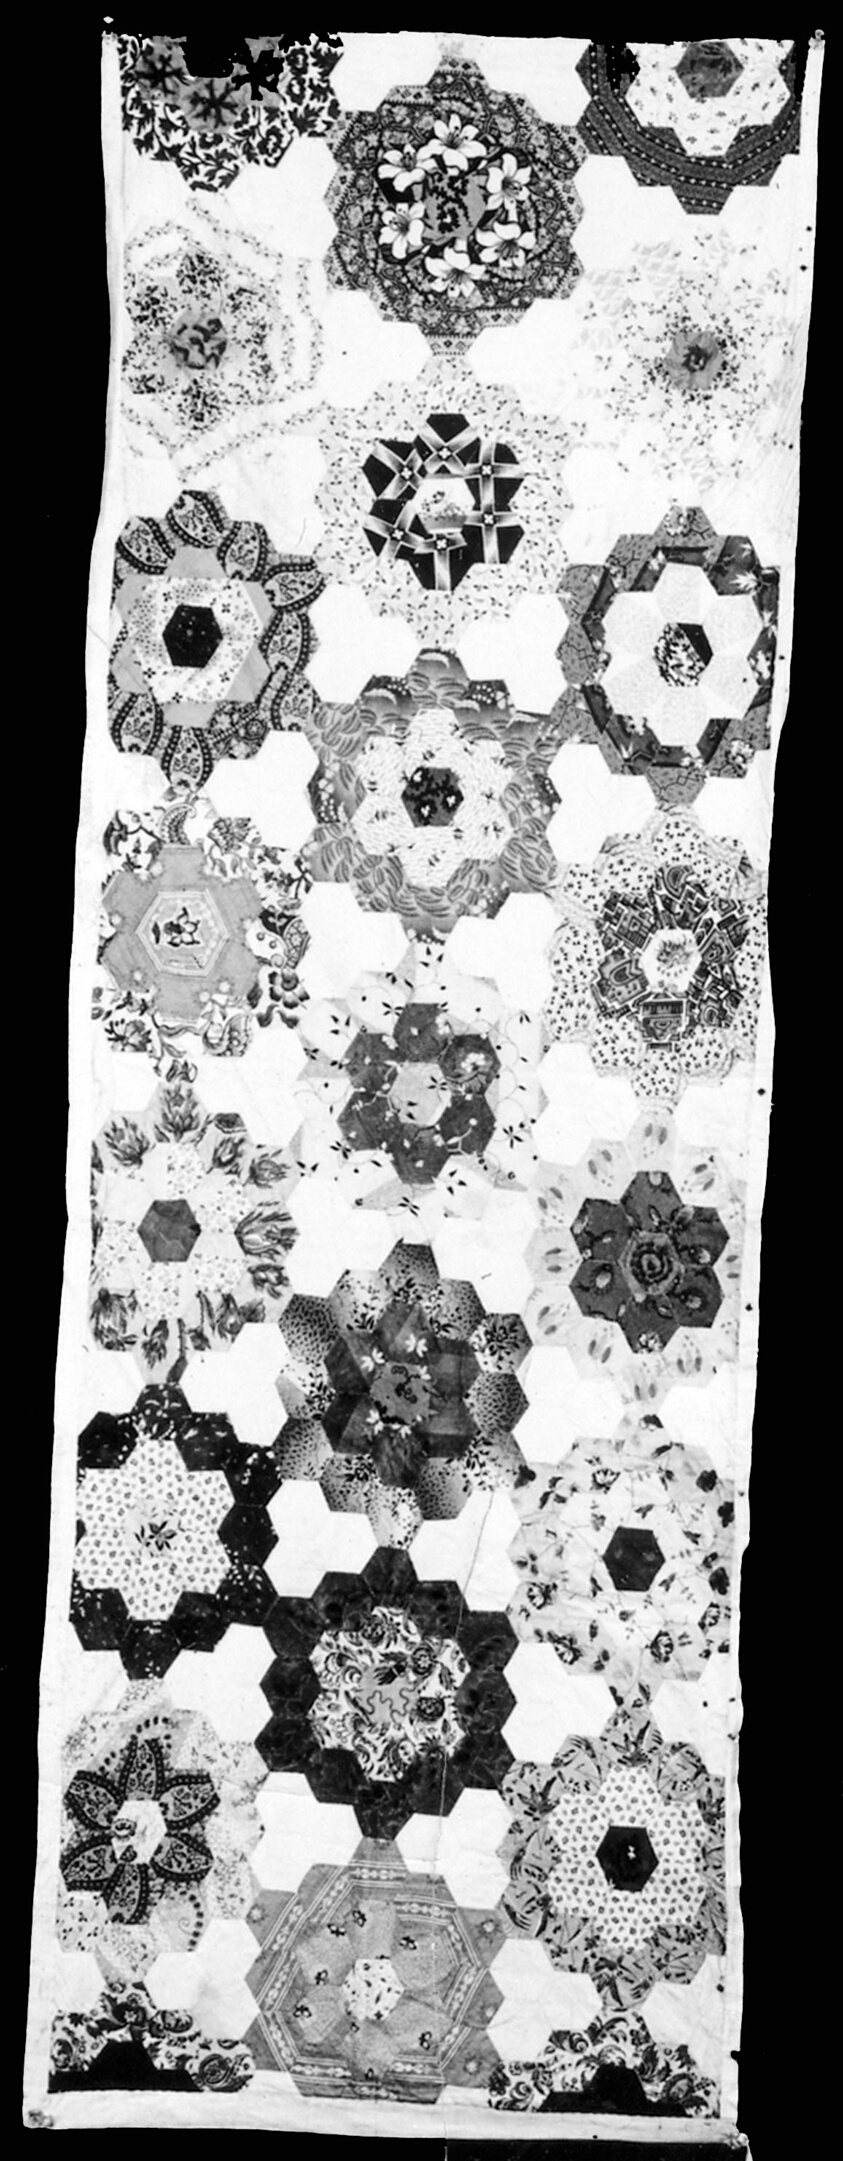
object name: Textile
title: Panel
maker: England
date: 19th century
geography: England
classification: textile; needlework (visual works)